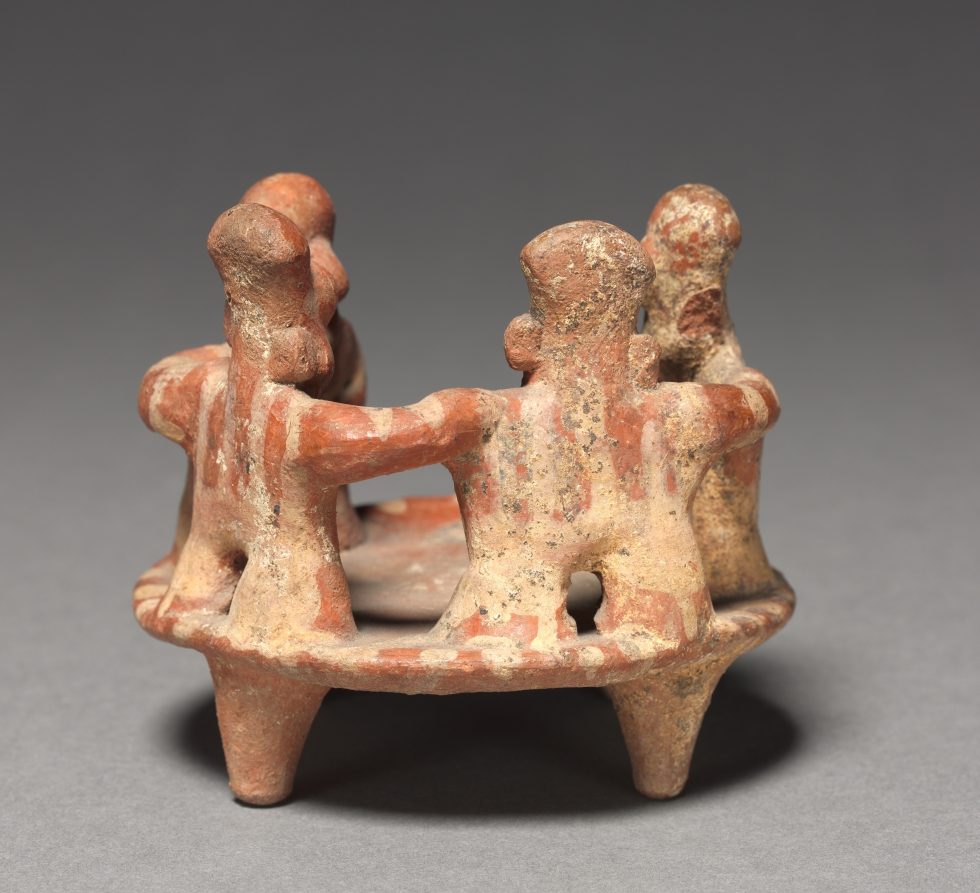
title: Dancing Group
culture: Mexico, Western Nyarit, 5th-6th Century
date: 400s-500s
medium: terracotta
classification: Sculpture